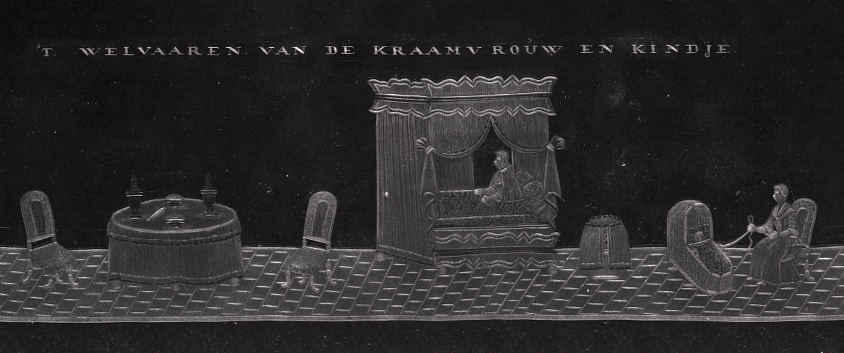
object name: Glass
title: Goblet with Cover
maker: Engraved by Jacob Sang (Dutch, born c. 1720); Amsterdam, Netherlands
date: 1750–70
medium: Lead glass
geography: England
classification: goblet; engraved; european decorative arts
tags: goblet